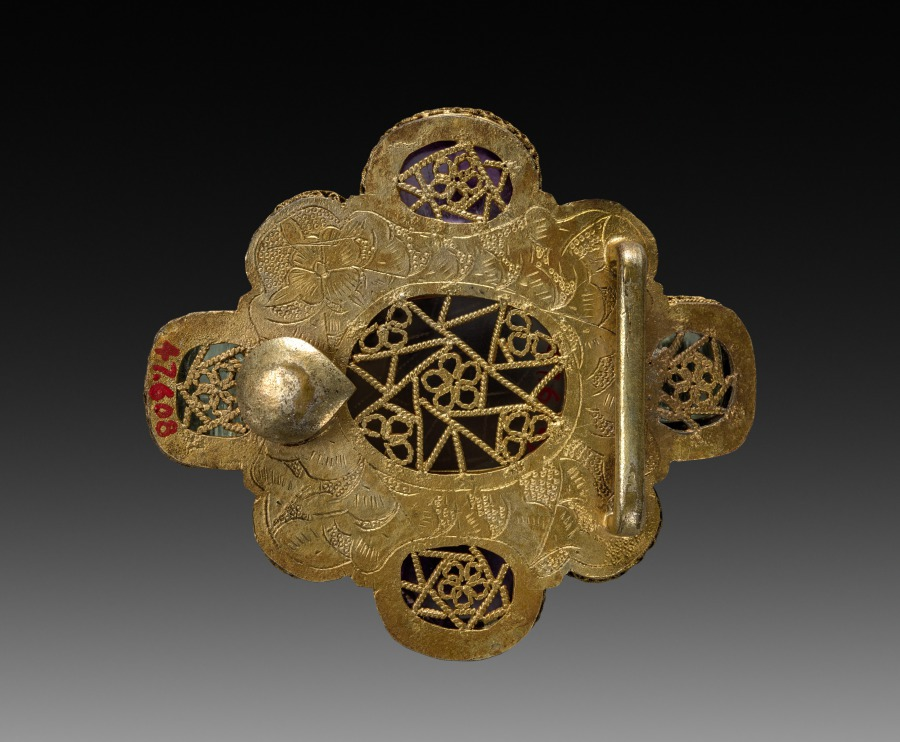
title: Buckle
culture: China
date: 1900s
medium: jade, amethyst, coral, crystal and agate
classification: Jewelry